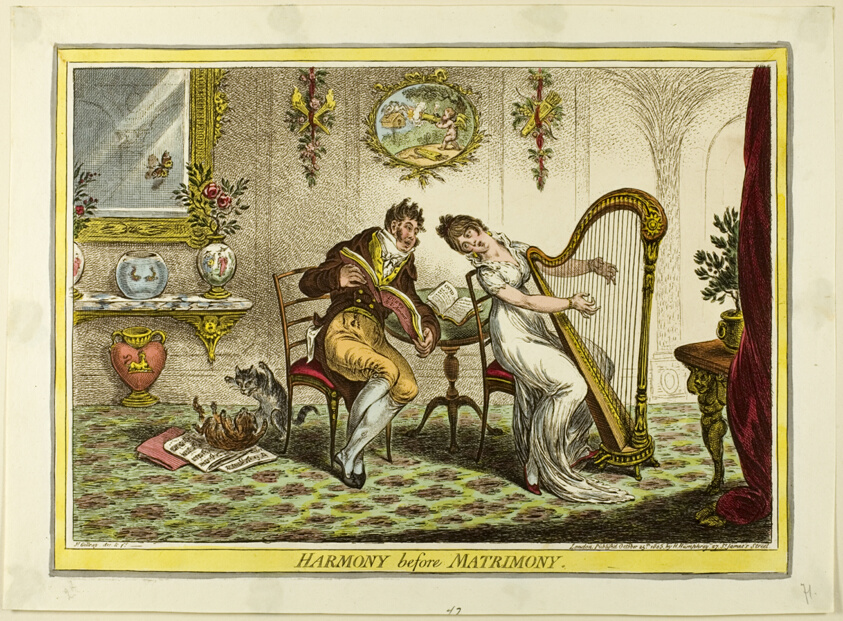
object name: Print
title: Harmony Before Matrimony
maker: James Gillray (English, 1756-1815); published by Hannah Humphrey (English, c. 1745-1818)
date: published October 25, 1805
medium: Hand-colored etching on paper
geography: England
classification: etching; print; prints and drawing